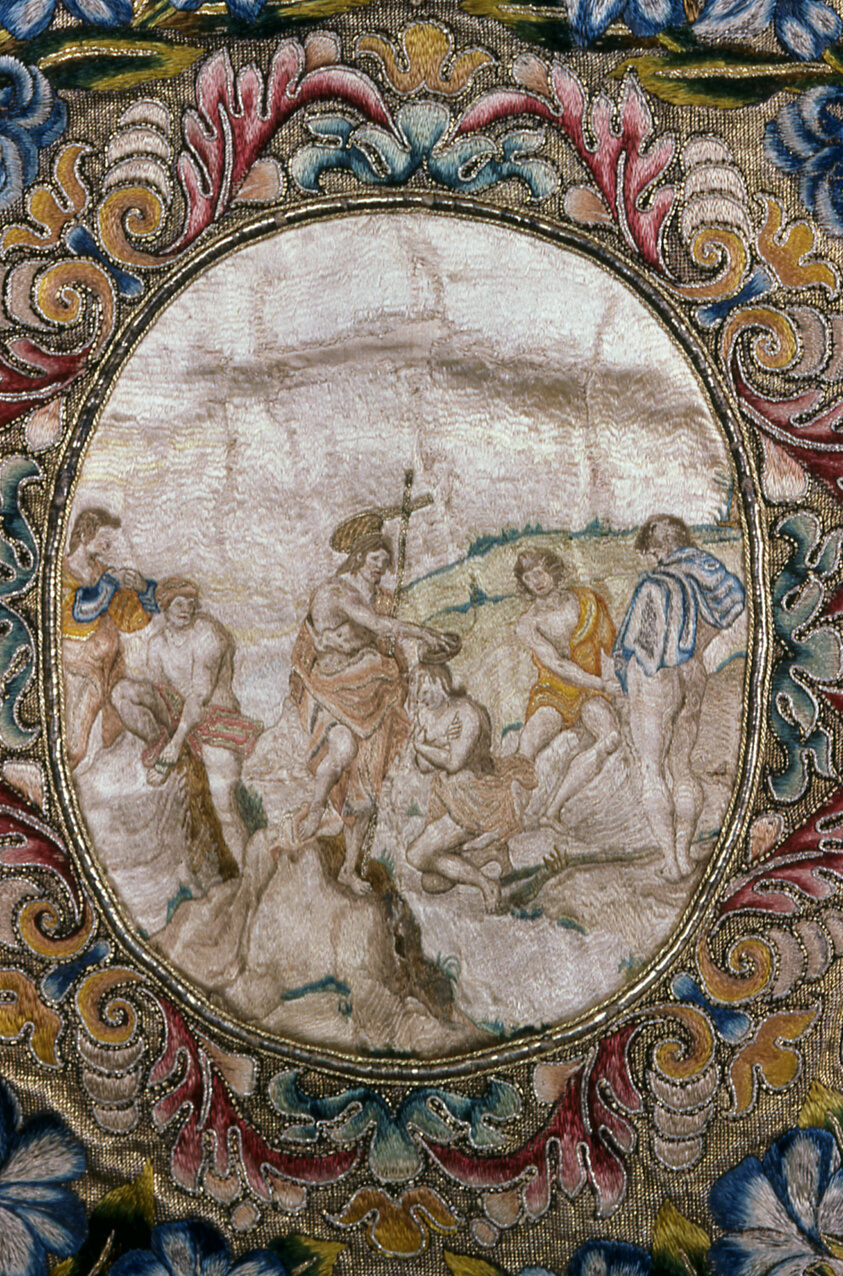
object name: Textile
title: Chasuble with Medallion Depicting John the Baptist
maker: After a fresco by Andrea del Sarto (Italian, 1486–1530) (Tondo only); Italy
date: 1575/1625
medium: Linen, plain weave underlaid with silk, plain weave with insert medallion of silk, warp-float faced satin weave; embroidered with silk and gilt- and silvered-metal-strip-wrapped silk and linen in satin, split and stem stitches; couching and French knots; edged with silk and gilt-metal-strip-wrapped silk, plain weave with patterning wefts and complementary weft weave tapes; lined with silk, plain weave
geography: Italy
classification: textile; liturgical; needlework (visual works)